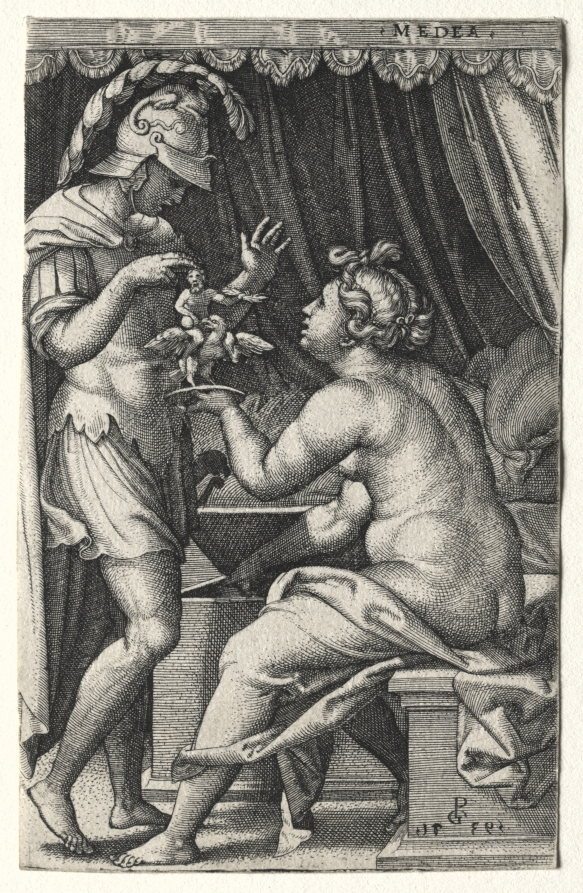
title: Medea and Jason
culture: Germany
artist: Georg Pencz (German, c. 1500–1550)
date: 1539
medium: engraving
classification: Print